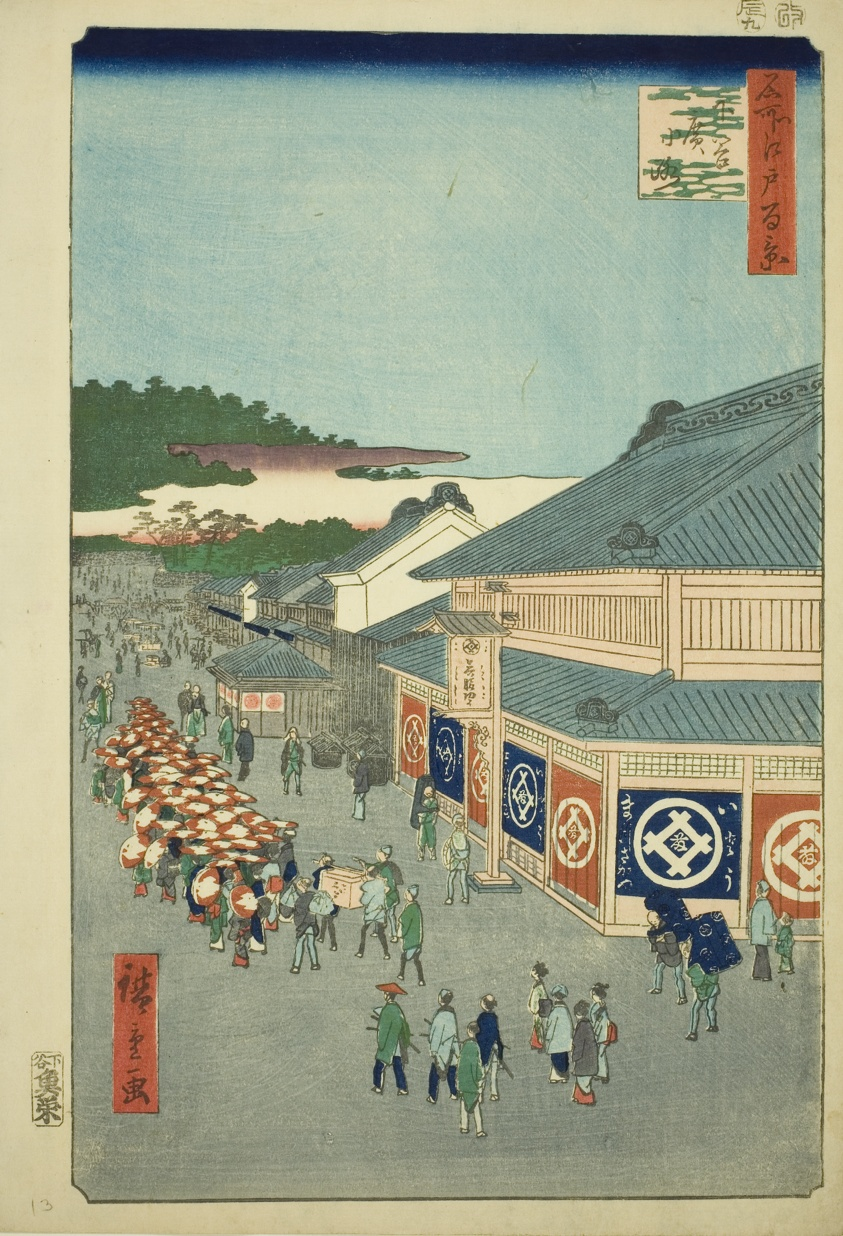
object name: Print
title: Shitaya Hirokoji, from the series “One Hundred Famous Views of Edo (Meisho Edo hyakkei)”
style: Japanese (culture or style)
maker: Utagawa Hiroshige 歌川 広重; Japanese, 1797-1858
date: 1856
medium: Color woodblock print; oban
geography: Japan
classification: print; asian art